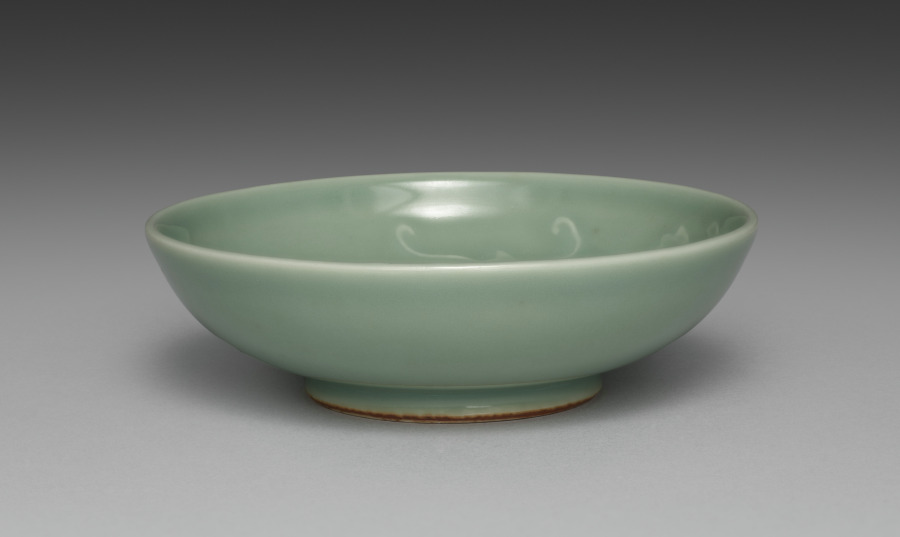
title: Dish from Dishes with Ivy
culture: Japan, Meiji period (1868–1912)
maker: Seifū Yohei III (Japanese, 1851–1914)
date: 1893–1914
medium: One from a set of five dishes; porcelain with green glaze and molded designs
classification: Ceramic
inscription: 清風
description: Yohei III’s main output for his sophisticated clientele was in the form of tea sets and dining sets. He often produced in pairs, sets of five, or sets of ten. This set of five dishes with a green glaze and designs of ivy vines in very low relief has unfortunately lost its box. These dishes are slightly larger than the other dishes, like CMA 2022.187, and so may have been not saucers but rather small plates for meals.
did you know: In his career, Seifū Yohei III created a range of dishes in green glazes.